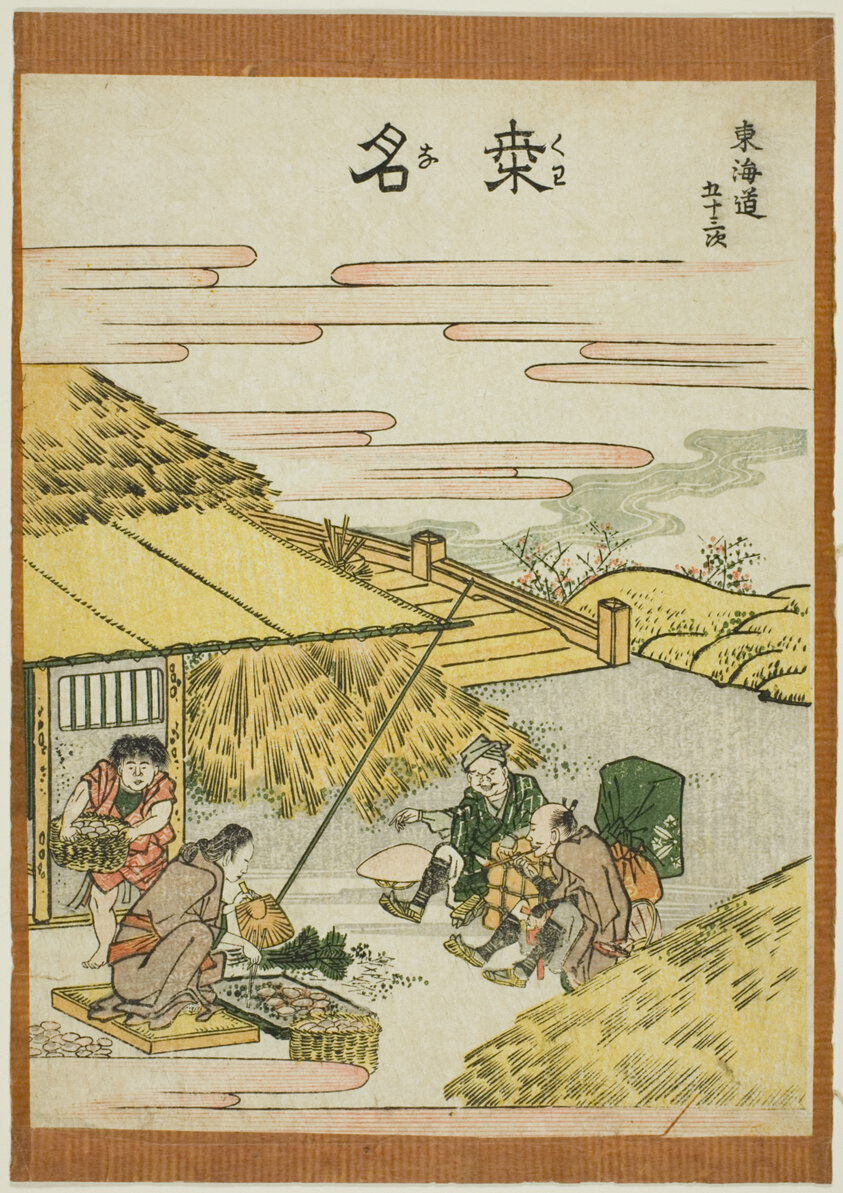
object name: Print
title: Kuwana, from the series "Fifty-three Stations of the Tokaido (Tokaido gojusan tsugi)"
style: Japanese (culture or style)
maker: Katsushika Hokusai 葛飾 北斎; Japanese, 1760-1849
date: c. 1806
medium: Color woodblock print; chuban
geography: Japan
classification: woodblock print; print; asian art